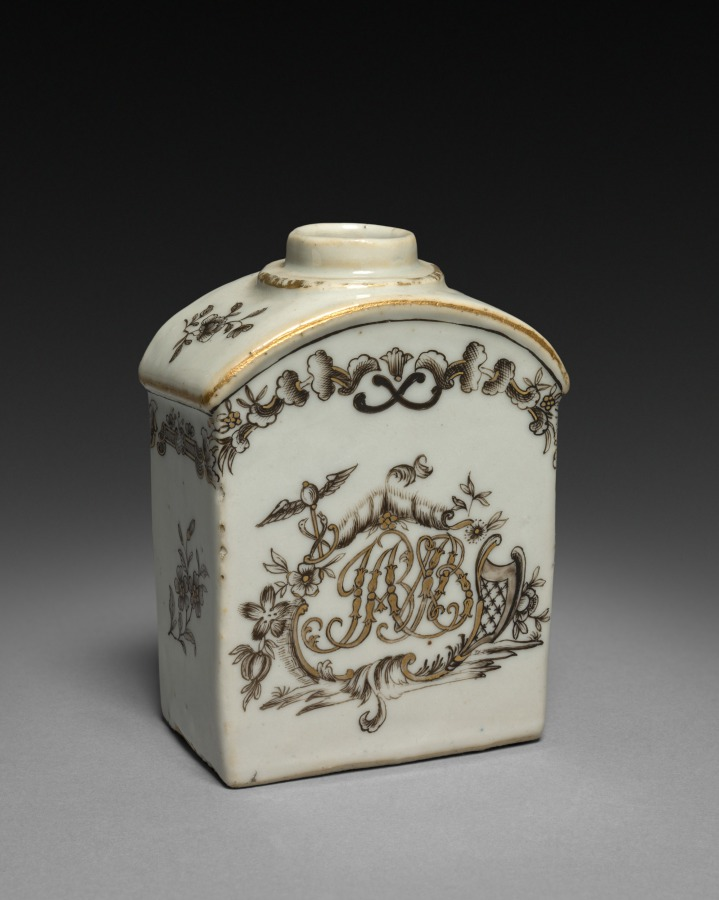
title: Tea Caddy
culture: China, Chinese Export -- European Market, 18th century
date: c. 1750–1770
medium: porcelain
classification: Ceramic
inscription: on body of tea caddy the initials seem to be: "J A B" and "L B" interlaced in a rococo cartouche.